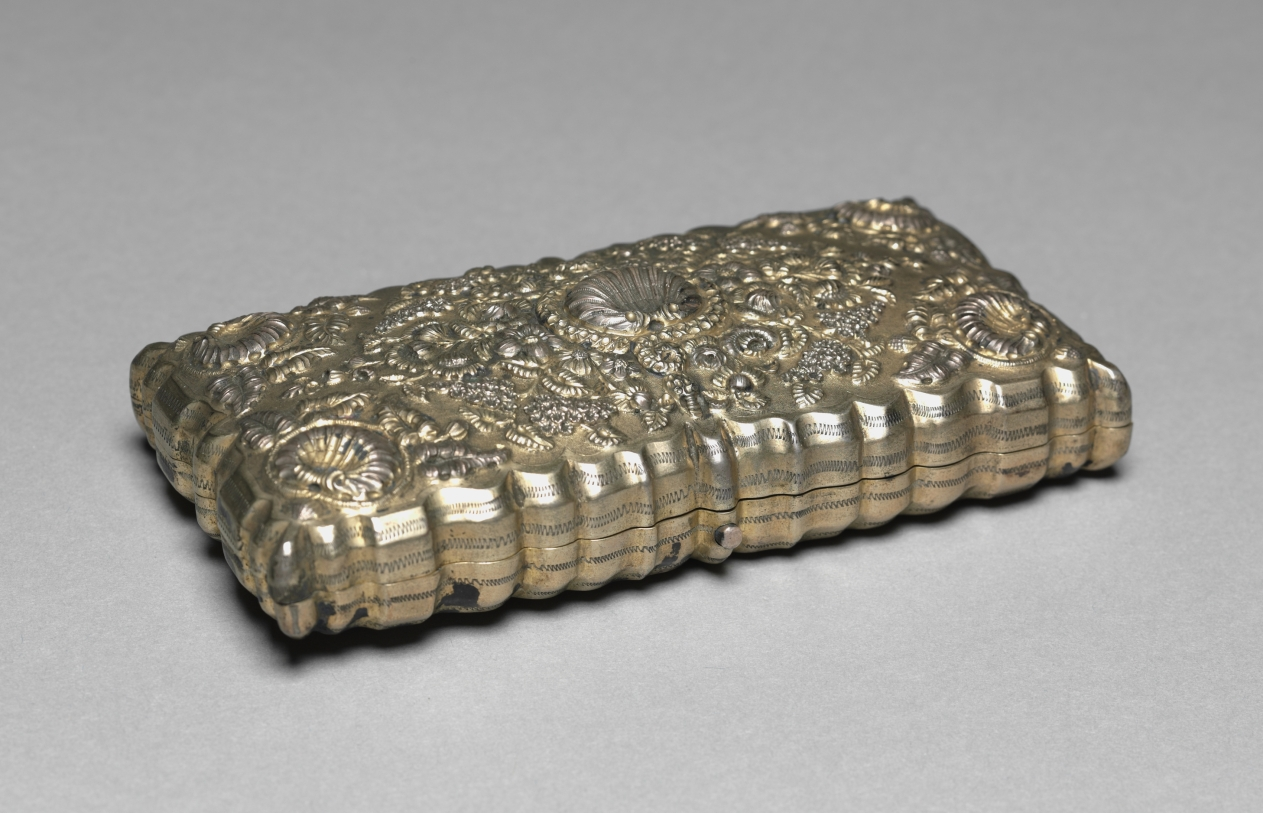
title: Cigar Case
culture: Russia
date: 1800s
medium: silver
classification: Silver